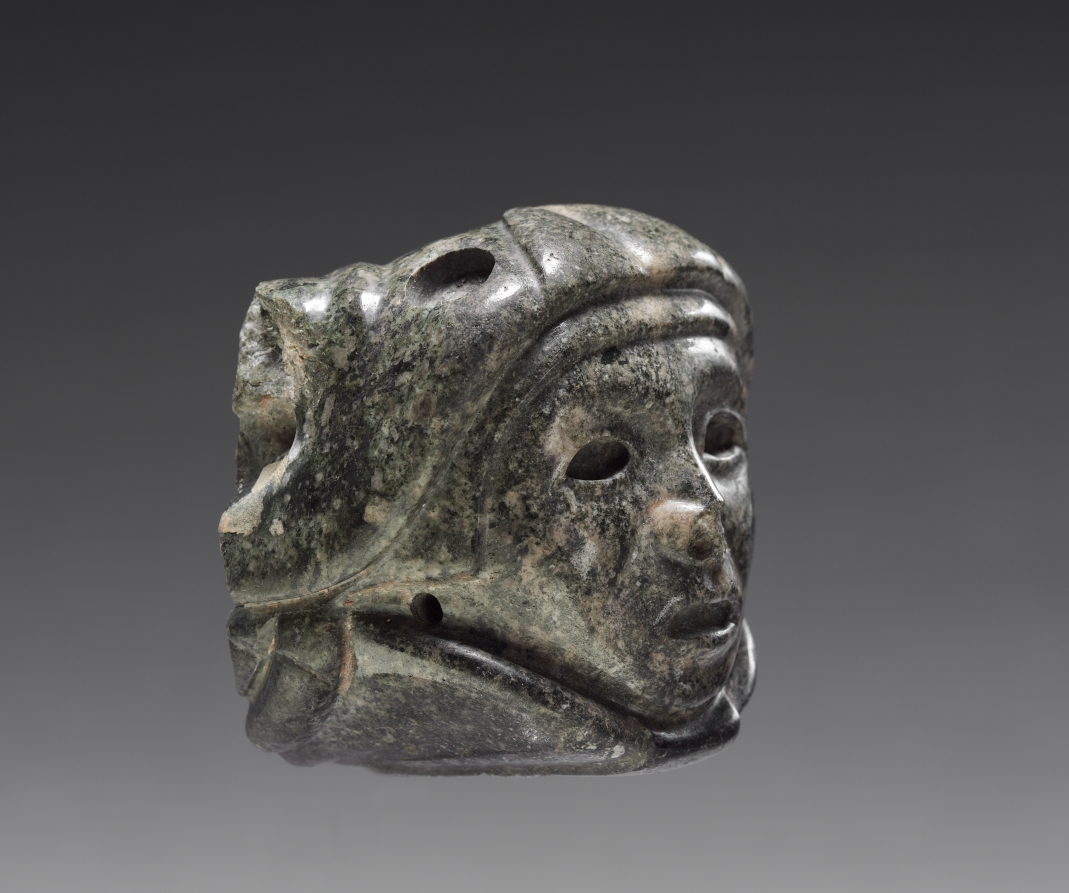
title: Head in Mouth of Snake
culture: Central Mexico, Aztec, Post-Classic Period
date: 1325–1519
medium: greenstone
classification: Stone